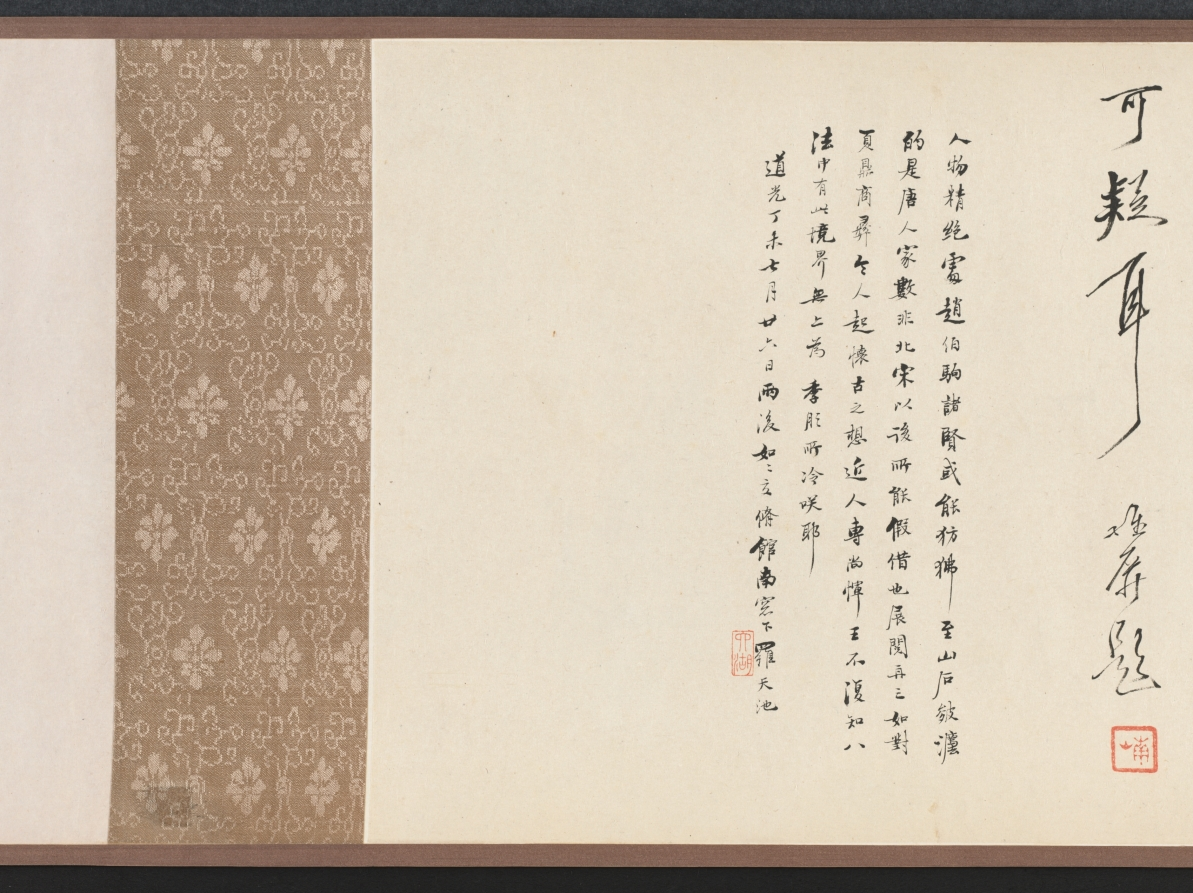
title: Waiting for the Moon in the Mid Autumn Festival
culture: China, Ming dynasty (1368–1644)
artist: Shi Rui (Chinese, c. 1400-c. 1470)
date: 1400s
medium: handscroll, ink, color, and gold on silk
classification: Painting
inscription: [印] 石氏以明; 游戯翰墨.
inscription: 僊山樓觀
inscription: 1 inscription, dated 1639, and 1 seal of Xiao Yuncong 蕭雲従 (1596-1673). Inscription by Xiao Yuncong: This is a painting by the Junior General Li. The painting is damaged and cracked at many places. Many of the paper strips for backing have been missing since long ago, but the colors are still fresh as if they had just been applied and the ink still looks moist. During the reign of Tianbao (742-756) of the Tang Dynasty, the Imperial Klansman Li Sixun was summoned to paint the walls of the Datong Hall. He was known as the "Senior General." His son, who came to be known as the "Junior General," was named Zhaodao. Of the stone epitaph [Li Sixun bei, or the "epitaph of Li Sixun," one of the best known calligraphic monuments of the Tang Dynasty], engraved with the calligraphy of Li Beihai 李北海 [Li Yong 李邕, 678-747], more than half has fallen off. Why, in contrast, was this painting able to survive? Or could it be that despite the fact that the stone is hard and the silk is soft, their preservation or destruction depends on some other factors? Moreover, since they were titled nobility of imperial descent, it is doubtful that they had the leisure and the mood to indulge in such decorative and descriptive blue and gold painting for the mere amusement of their fellow men. Recently, I read the Yi zhou ming hua lu 益州名畫錄 [by Huang Xiufu 黃休復, preface 1005]. I found a certain Li Chin-nu who compared himself with Li Zhaodao 李昭道 and was called by the Sichuan people the Junior General Li. In a painting which he did, entitled Mt. Ch'ing-ch'eng, the architectural structure of the pavilions, terraces, bridges, and boats are meticulous and accurate. The horsemen on a spring outing are as small as grain and the wild geese among the clouds as tiny as dust. It was also said that he painted on silk of any length in accordance to specific commissions. Is it possible that this painting is one of his? Since that time 700 years have passed. Yet one of the two Junior General Li's must be our painter. Formerly, there were the so-called "Four Excellents" in the Hall of Portraits of the Buddhist monk Wu-ta Kuo-shih: the [portrait] painting by Ch'ang Ts'an [act. ca. 881-888}, the calligraphy by Priest Tao-ying, the eulogy by Li Shangyin 李商隱 [813-858], and the landscape by Li Sheng [act. ca. 908-925]. This Li Sheng was styled Chin-nu and was also called Junior General Li. In the tenth month of the Chi-mao year, the twelfth year of the Chongzhen era [1639], recorded by Xiao Yuncong of Wuhu. trans. WKH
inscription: 4 colophons and 30 additional seals: 1 seal of Xu Qianxue 徐乾學 (1631-1694); 1 seal of Li Chien 黎簡 (1747-1799); 1 seal of Chang Chin-fang (18th c.); 2 seals of Sun Erzhun 孫爾準 (1770–1832); 1 colophon and 2 seals of Zhang Weiping 張維屛 (1780-1859); 1 seal of Wu Rongguang 吳榮光 (1773-1843); 1 colophon and 2 seals of Luo Tianchi 羅天池 (1826 jinshi); 7 seals of Wu Yanhui 伍元蕙 (active 1821–1851); 2 colophons and 4 seals of Pan Zhengwei 潘正煒 (1791-1850); 9 seals unidentified.